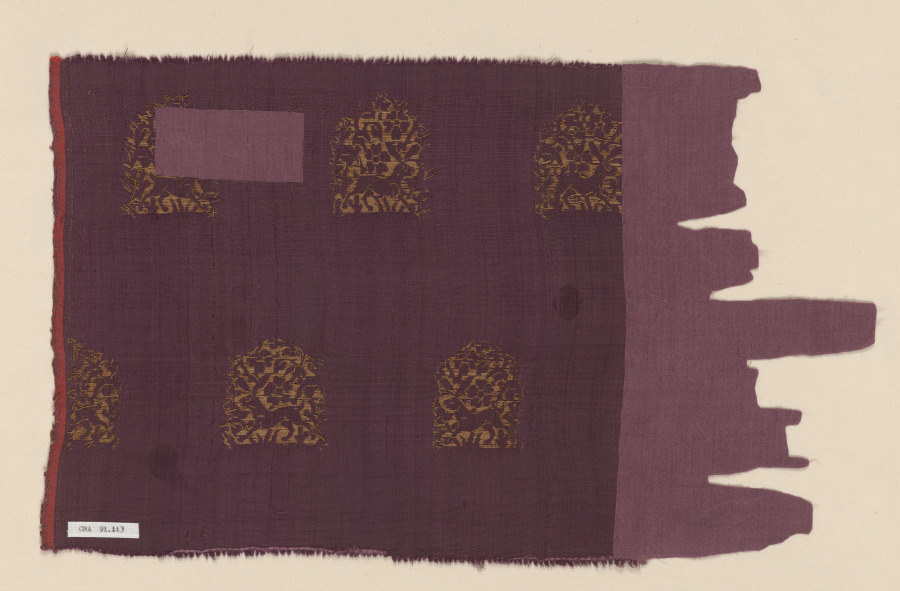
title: Brocade with Hares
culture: Northern China, Yuan dynasty (1271-1368)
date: 1200s–mid-1300s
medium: Silk: tabby, brocaded; gold thread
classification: Textile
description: The motif of the hare among bushes may relate to the hunting activities of the Khitan, the Jurchen, and the Mongols. Hare hunts are recorded in the Liaoshi (History of the Liao Dynasty) and were often reported by envoys returning to China from the northern states. The asymmetry of the image in this textile is characteristic of Jin brocades. However, the paired (instead of single) warps reveal the influence of craftsmen from the eastern Iranian world and therefore dates the textile to the Mongol period.